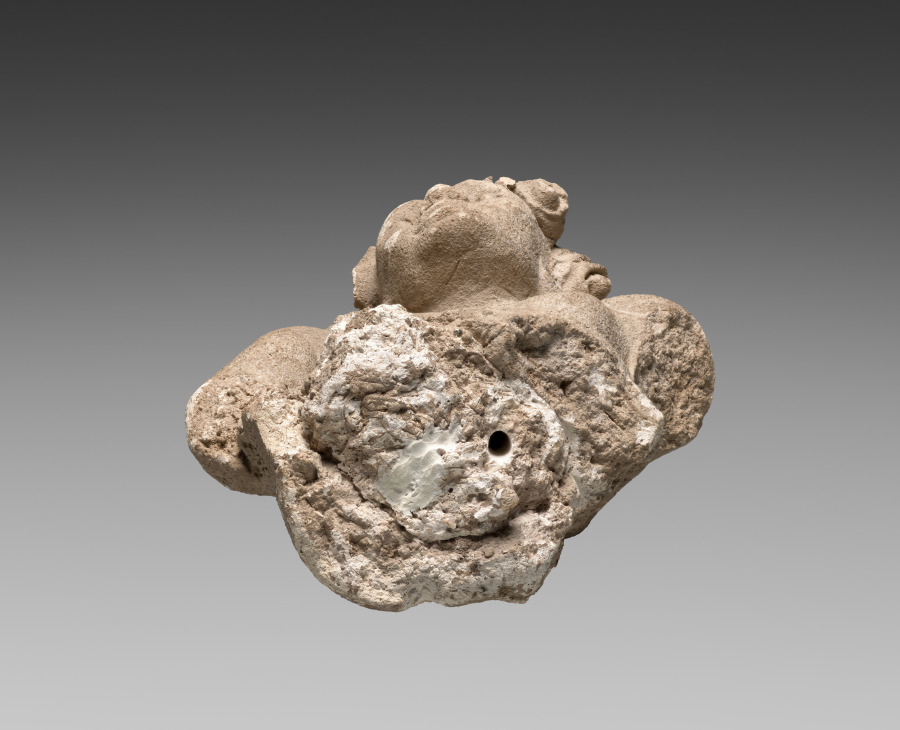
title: Male Atlantean figure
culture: Afghanistan, Hadda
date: c. 300 CE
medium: stucco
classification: Sculpture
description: The musculature, thick curly locks of hair, and deeply inset eyes of this fragmentary figure show the sculptor's incorporation of Greco-Roman forms. His hunched posture suggests that he supported a heavy weight, such as the dome of a stupa on his back. Rows of figures would have visually supported the stupa, in which relics of the Buddha or other revered Buddhist leader were interred.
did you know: Most sculptures from Hadda are preserved in museums, since the site was razed in 2001.